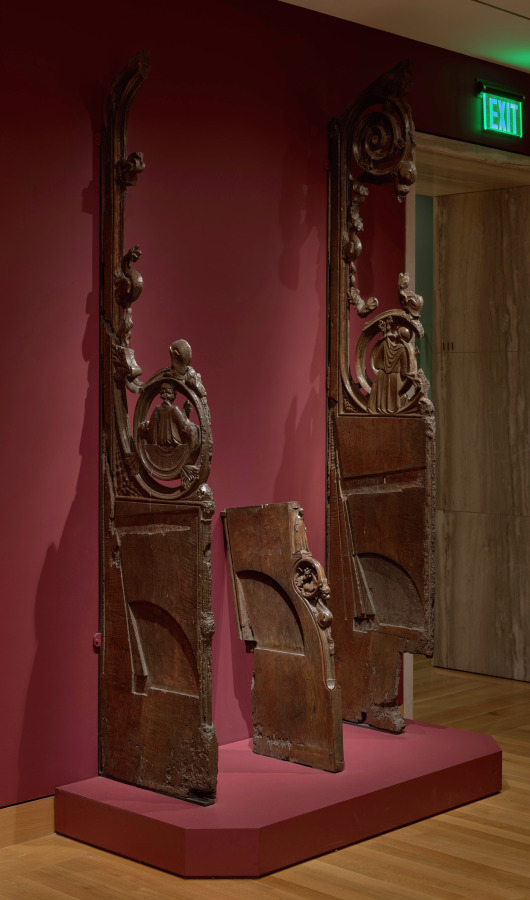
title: Panel from a Choir Stall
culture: Spain, Catalonia, Monastery of Pedralbes, 14th century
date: c. 1330–1340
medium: walnut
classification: Furniture and woodwork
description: The smaller panel here originated from an interior portion of a choir stall. The panel depicts a female figure in a long gown standing on a plinth above two of the apocalyptic beasts, the winged lion of Saint Mark and the winged ox of Saint Luke, which are supported by a wyvern (a heraldic winged dragon).